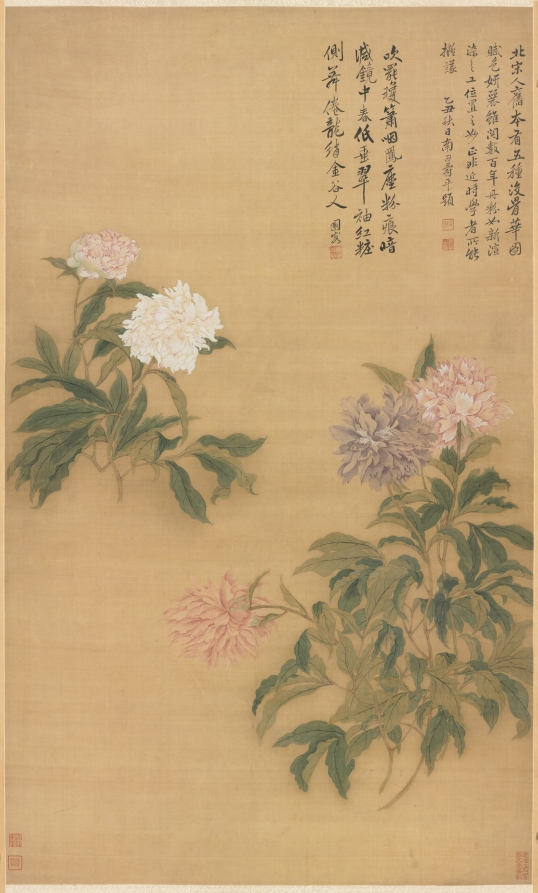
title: Herbaceous Peony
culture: China, Qing dynasty (1644-1911)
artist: Yun Shouping (Chinese, 1633–1690)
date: 1685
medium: Hanging scroll; ink and color on silk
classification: Painting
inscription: Artist's inscription, signature, and 3 seals: An old painting by an anonymous painter of the Northern Song Dynasty has five varieties of flowers painted in the boneless manner. Its colors are so beguiling and beautiful, that even after several hundred years its lead pigments are like new. The skill with which the ink and colors were applied and the subtlety of its composition find no equal among modern followers. On an autumn day in the yichou year [1685], Nantian, Shouping inscribed. [2 seals] Zhengshu; Shouping zhi yin.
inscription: Artist's poem (not translated). Signed Yuange. [seal] Nantian caoyi.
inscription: 3 additional seals of C. C. Wang 王季遷 (1907–2003).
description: Yun Shouping came from Piling (modern Changzhou), Jiangsu province, a center of floral, plant, and insect painting. He had joined the anti-Manchu resistance, was briefly imprisoned, and witnessed the death of family members in 1644. Like other artists, Yun Shouping expressed his Ming loyalism in coded pictures. The peony, king of flowers, and a spring garden motif developed new meaning during the Qing dynasty. The inscription indicates that Yun turns the flower into a motif representing the glorious past. The herbaceous peonies here appear somewhat withered and pale, with faint reddish veins running through its broken branches, perhaps a coded message. The inscription reads, An old painting by an anonymous painter of the Northern Song Dynasty has five varieties of flowers painted in the boneless manner. Its colors are so beguiling and beautiful, that even after several hundred years its lead pigments are like new. The skill with which the ink and colors were applied and the subtlety of its composition find no equal among modern followers.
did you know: In East Asian art, peonies traditionally symbolize prosperity and wealth.